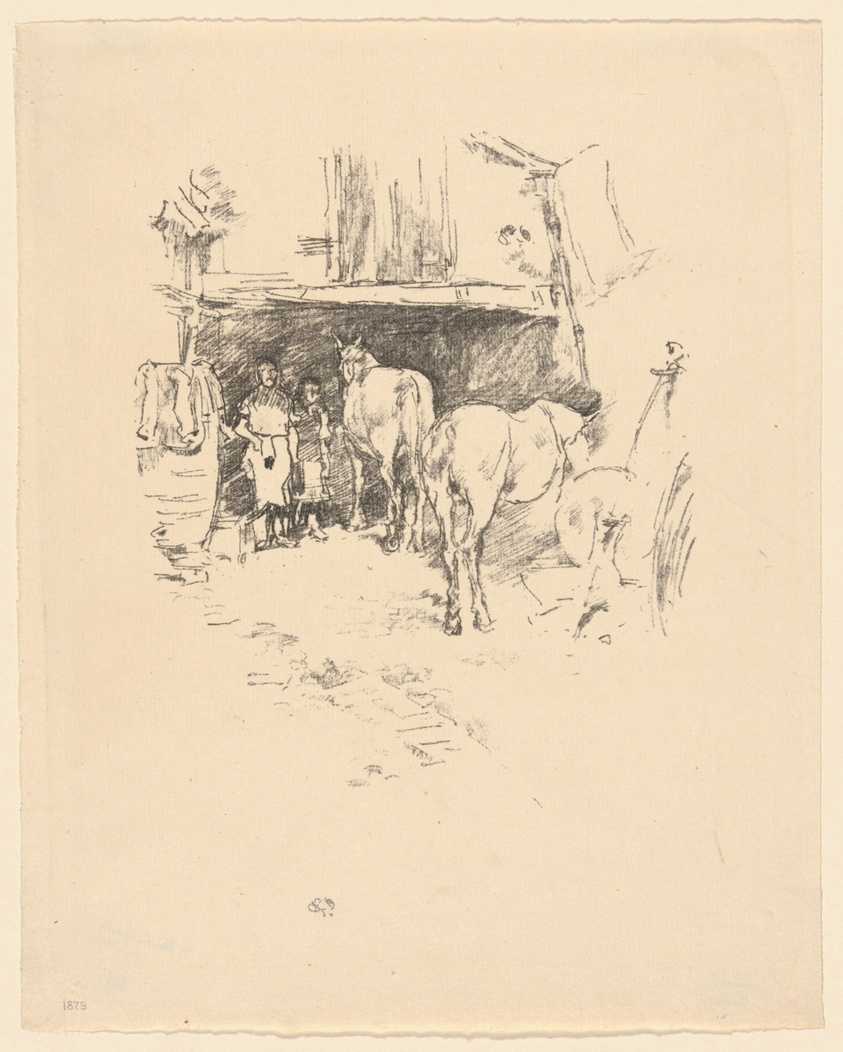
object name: Print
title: The Smith's Yard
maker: James McNeill Whistler (American, 1834-1903)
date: 1895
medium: Transfer lithograph in black on cream laid paper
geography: United States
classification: transfer lithograph; lithograph; print; prints and drawing; paper